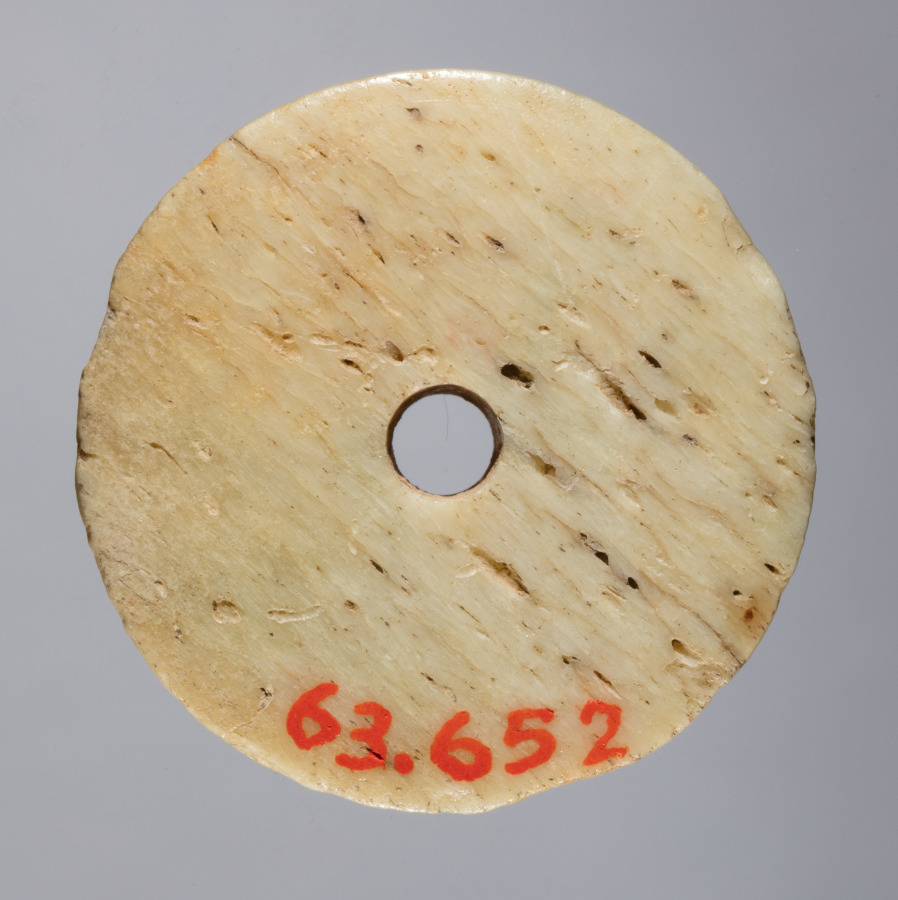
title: Spindle Whorl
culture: Iran, early Islamic period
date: 700s - 900s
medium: bone, incised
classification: Spindle Whorl